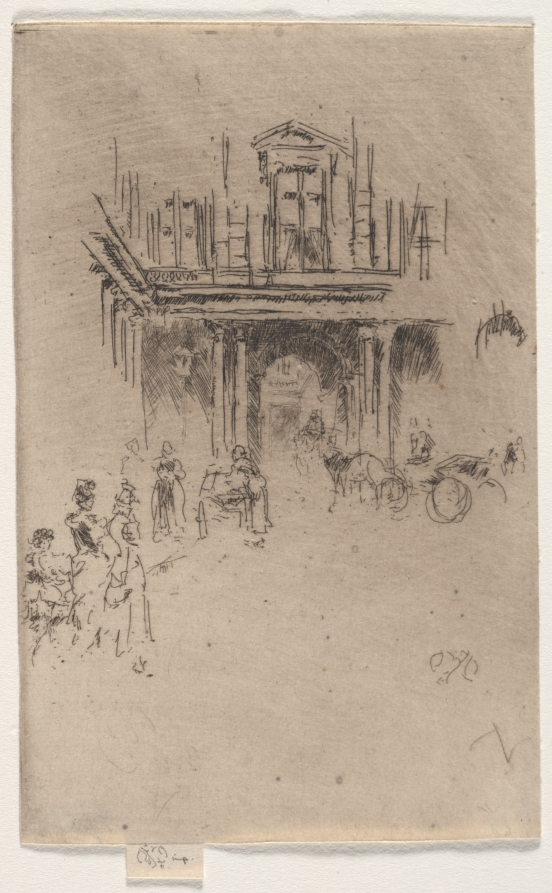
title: A Corner of the Palais Royal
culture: America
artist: James McNeill Whistler (American, 1834–1903)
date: 1886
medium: etching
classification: Print